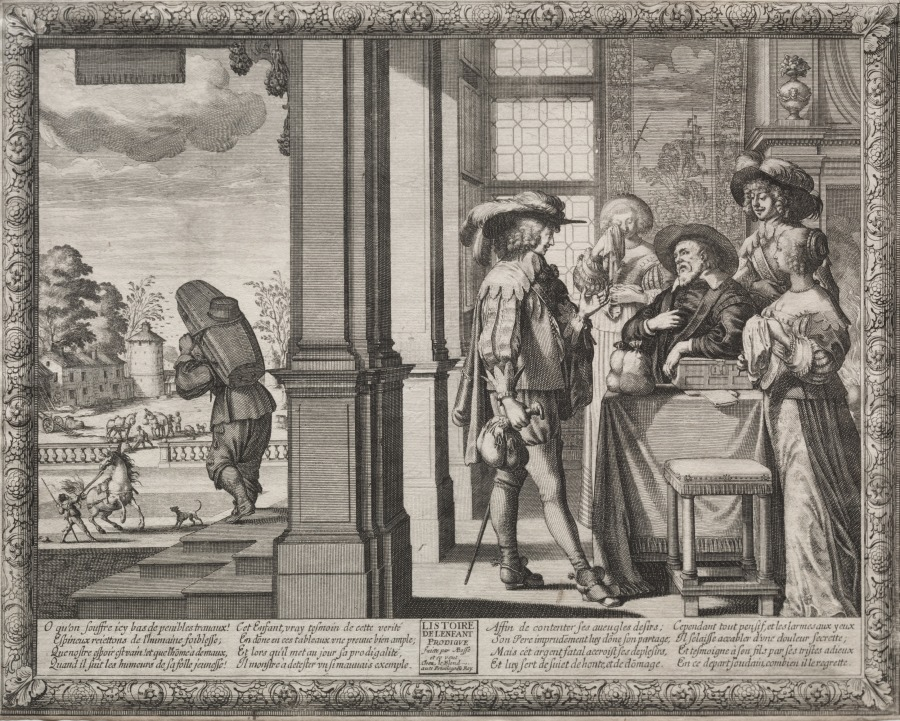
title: The Prodigal Son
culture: France, 17th century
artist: Abraham Bosse (French, 1602–1676)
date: 1635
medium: etching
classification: Print